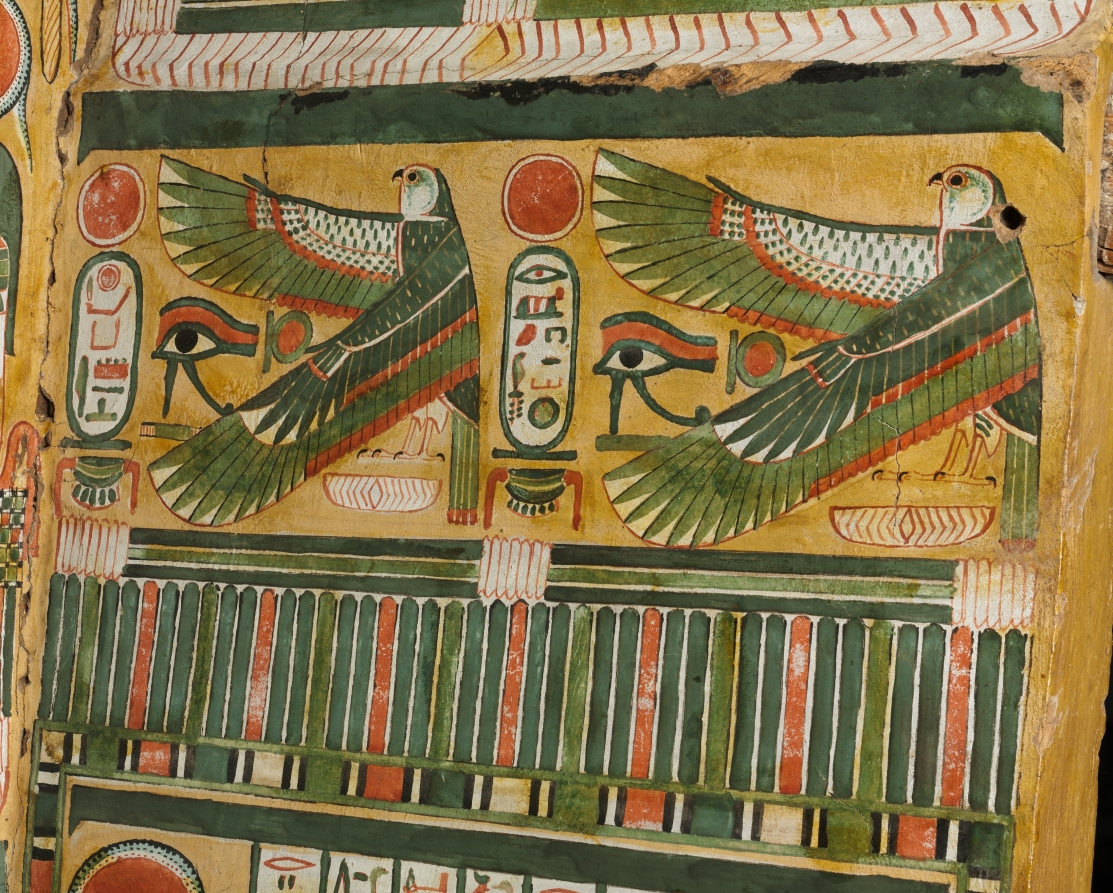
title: Coffin of Bakenmut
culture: Egypt, Thebes, Third Intermediate (1069–715 BCE), Dynasties 21–22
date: c. 1000–900 BCE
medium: gessoed and painted sycamore fig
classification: Funerary Equipment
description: The coffin of Bakenmut is one of the finest examples of painted wooden coffins made for the priests of Amen and their families at Thebes during Dynasty 21 and early Dynasty 22. The pharaohs of this time were no longer buried in the Valley of the Kings, but instead built tombs in the Delta, far to the north, where they resided. Security was lax in the Theban necropolis. The coffins and funerary goods of the wealthy citizens of Thebes were placed in unmarked and undecorated family tombs cut into the cliffs on the west bank of the Nile. All the care and detail that in more prosperous times were devoted to the decoration of the tomb chapel were now lavished on the elaborately painted coffins. Every available surface is crowded with religious scenes, images of funerary gods and goddesses, protective spells, and magical symbols. The deceased appears mummiform. An elaborate floral collar entirely covers the upper body, exposing only the separately attached hands (now lost). A pair of red "mummy braces" are crossed over the chest, their point of intersection marked by a winged sun disk. The lower body is covered with tiny figures modeled in gesso against a yellow background, which gives the effect of gold inlaid with glass or semiprecious stone. The decoration on the interior features two deified dead kings of Dynasty 18. Although these rulers had lived centuries before, memory of their greatness was still very much alive. The main scene near the top depicts Tuthmosis III, the great military pharaoh, who lived 500 years before Bakenmut. Posed as a mummy, the ruler wears a brilliant feathered garment enfolding him with falcon’s wings. The scene below features back-to-back seated images of Amenhotep I, regarded as the patron of the Theban cemetery and worshiped as a local god there.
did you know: Originally another smaller coffin was placed inside this outer coffin and in that the deceased with a mummy board would have rested.